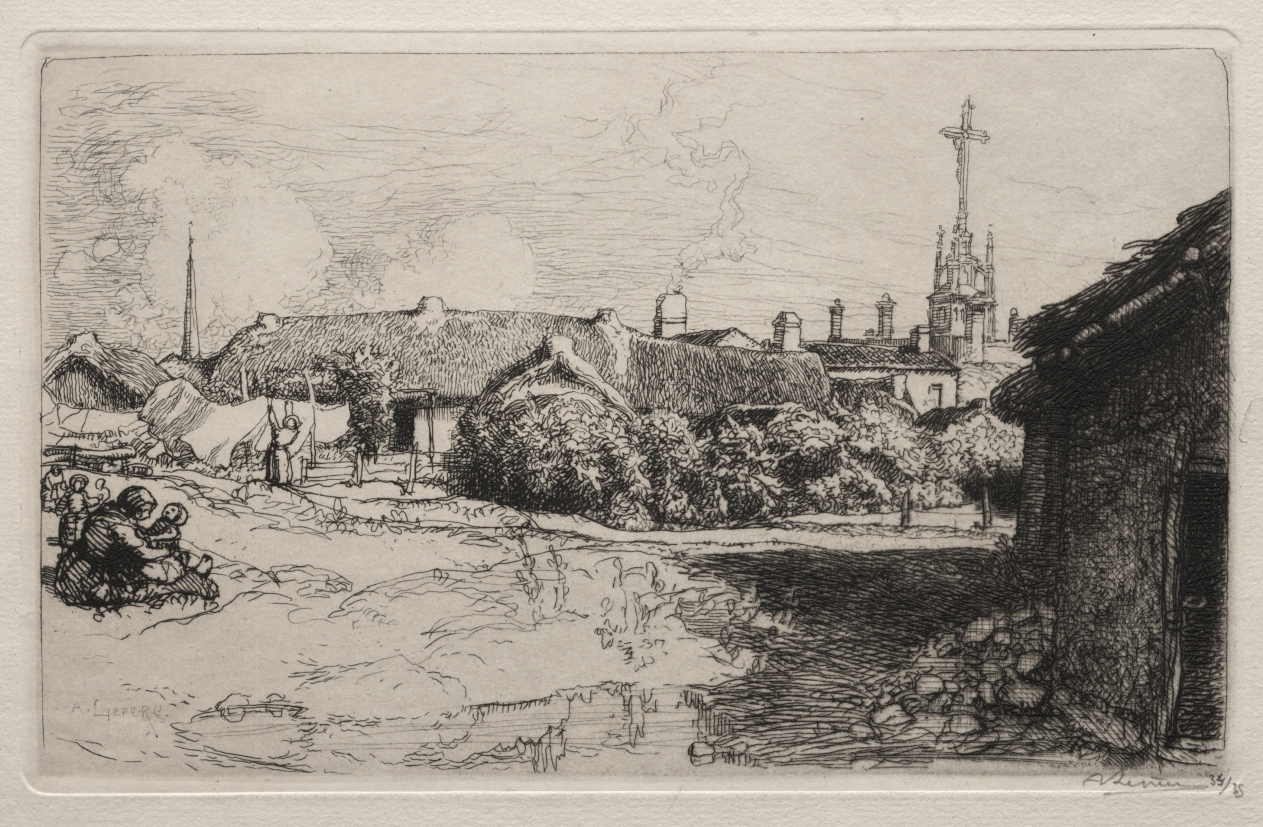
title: Le Calvaire, St. Jean-de-Mont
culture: France, 20th century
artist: Auguste Louis Lepère (French, 1849–1918)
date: 1909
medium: etching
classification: Print